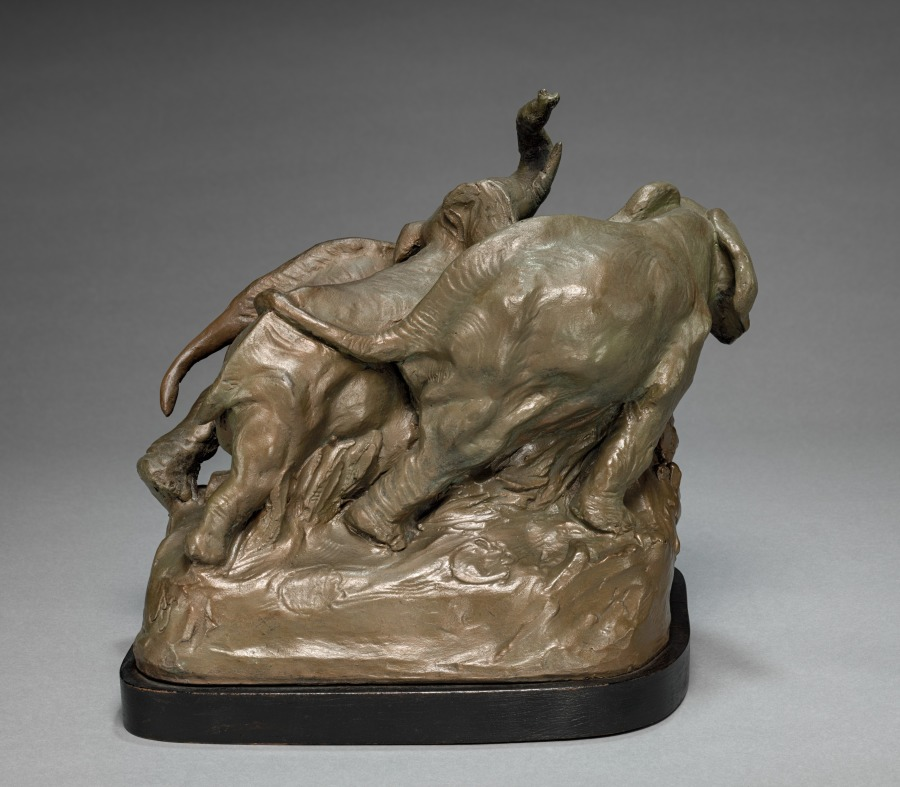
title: Mired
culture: America, Ohio, Cleveland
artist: John Ross Stewart (American, 1872–1954)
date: 1920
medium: plaster painted to resemble patinated green bronze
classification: Sculpture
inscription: incised in plaster near base: "Mired" and "JRS."